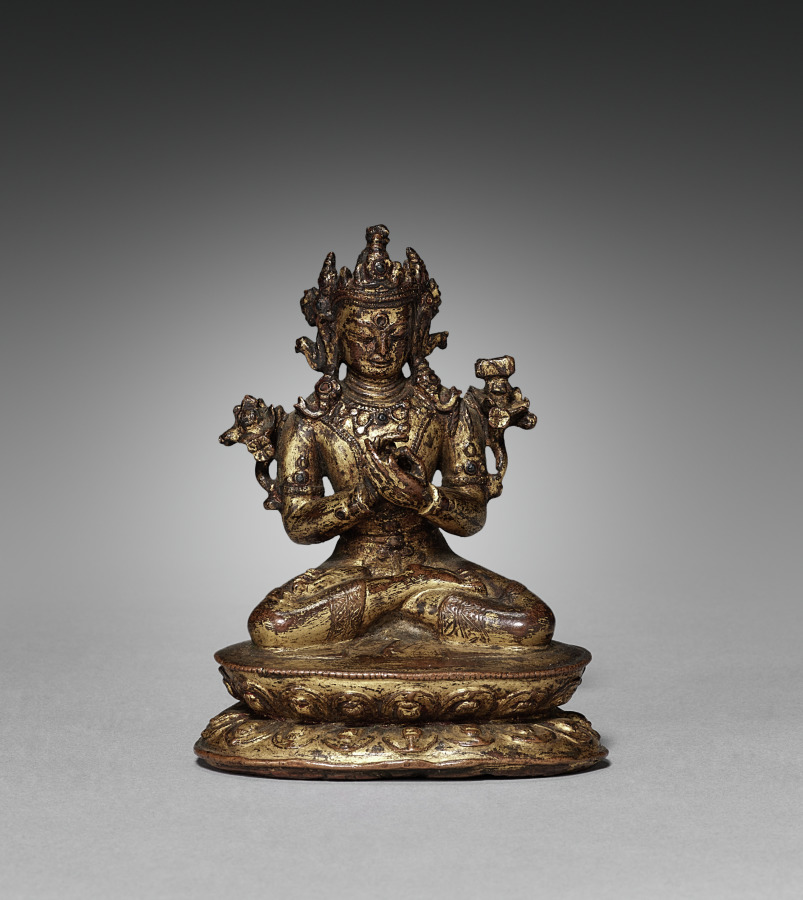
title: Manjuvara Turning the Wheel of the Law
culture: Nepal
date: 1300s–1400s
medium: gilded copper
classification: Sculpture